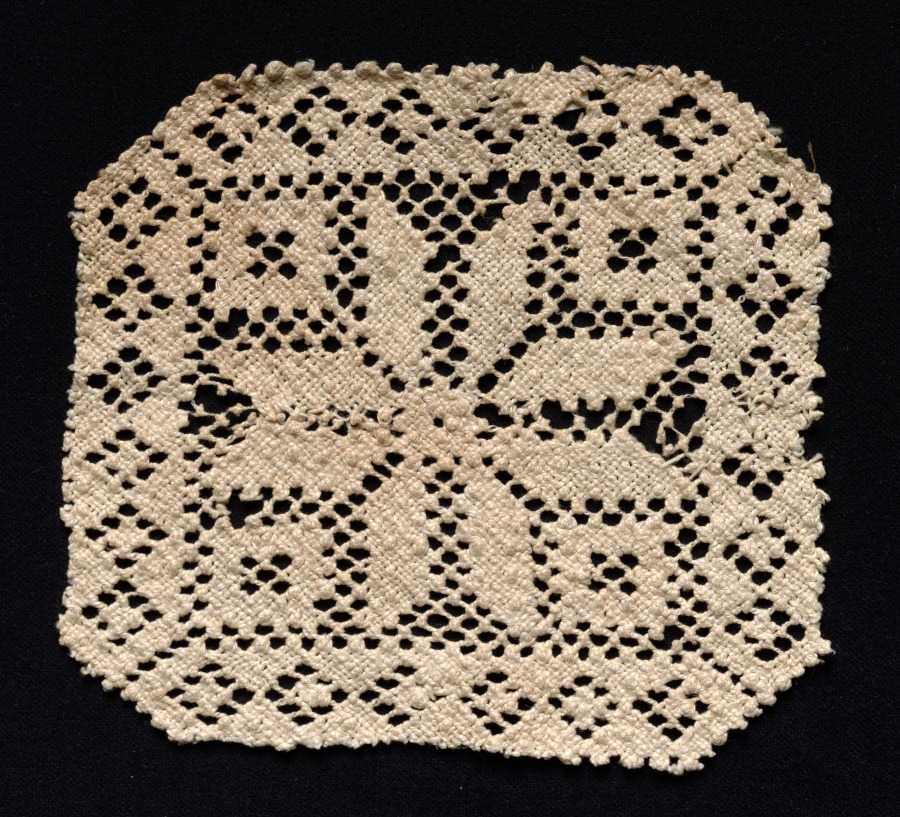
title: Fragment with Floral Motif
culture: Spain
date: 1600s–1700s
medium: Bleached linen (est.): needle lace, filet/lacis (knotted ground and darned in two directions)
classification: Lace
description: Though this fragment of lace is completed in the filet/lacis technique, the floral motif imitates a form of needle lace particular to Spain, known as Ruedas or Sol Lace, due to its radial patterns.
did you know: Myrta Leonora Jones, the donor of this work, was a women’s rights activist in Cleveland in the early 20th century.